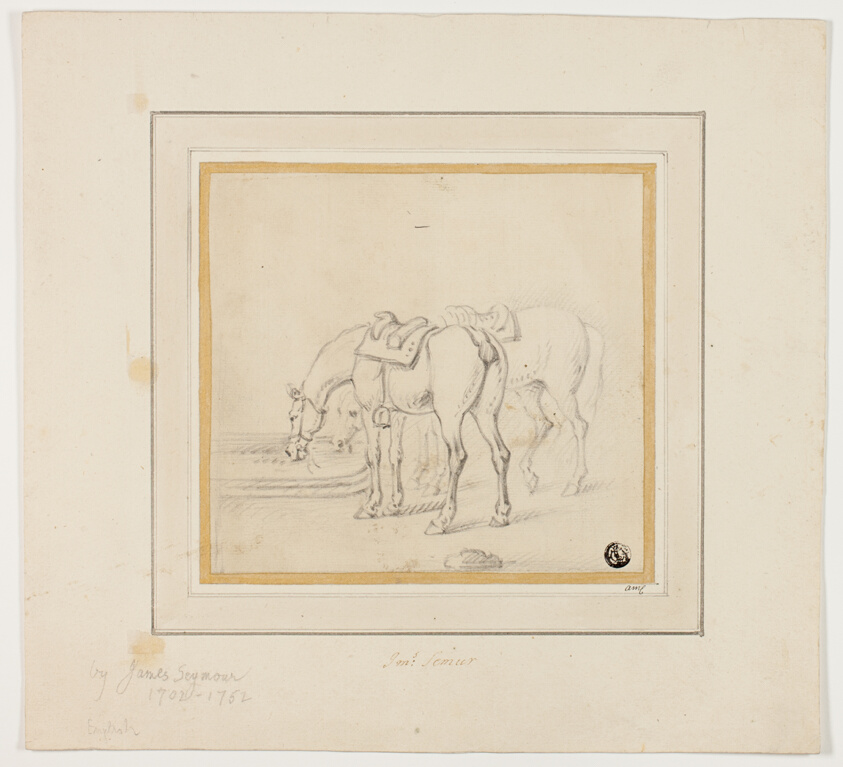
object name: Drawing and Watercolor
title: Two Horses Drinking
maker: James Seymour (English, 1702-1752)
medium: Graphite on cream laid paper, laid down on card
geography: England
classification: graphite; drawings (visual works); prints and drawing